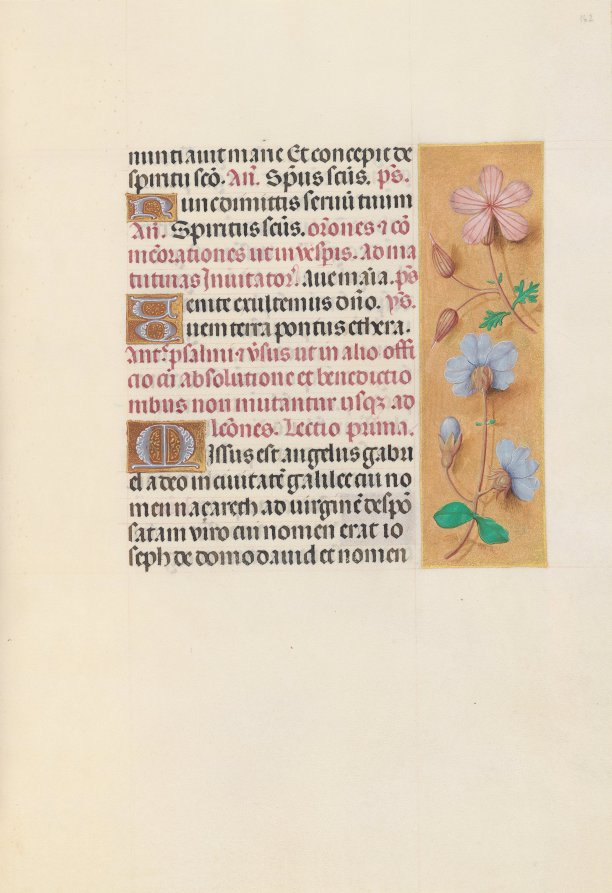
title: Hours of Queen Isabella the Catholic, Queen of Spain: Fol. 162r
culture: Flanders, Ghent and Bruges, late 15th century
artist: Master of the First Prayerbook of Maximillian (Flemish, c. 1444–1519)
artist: and Associates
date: c. 1500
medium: ink, tempera, and gold on vellum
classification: Bound Volume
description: This manuscript was illuminated by a circle of at least five highly organized manuscript painters active in the Flemish cities of Ghent and Bruges. The principal illuminator was Alexander Bening, who painted the majority of the book's miniatures. Manuscripts produced by this circle of artists are renowned for the decoration of their borders, which typically feature a rich variety of realistically-painted flowers, birds, and butterflies. This prayer book, called a book of hours, was intended not for a cleric, but for the private devotions of a lay person-in this case, Isabella the Catholic, Queen of Spain (1451-1504). Isabella's coat of arms embellishes the book's frontispiece. It is unlikely that the book was commissioned by the Queen herself; rather, she probably received it as a diplomatic gift from someone courting her patronage, perhaps Cardinal Francisco Jimenez de Cisneros. A Franciscan friar, Jimenez was dependent upon Isabella for his advancement, first to the post of Queen's confessor in 1492, and then to Archbishop of Toledo in 1495.